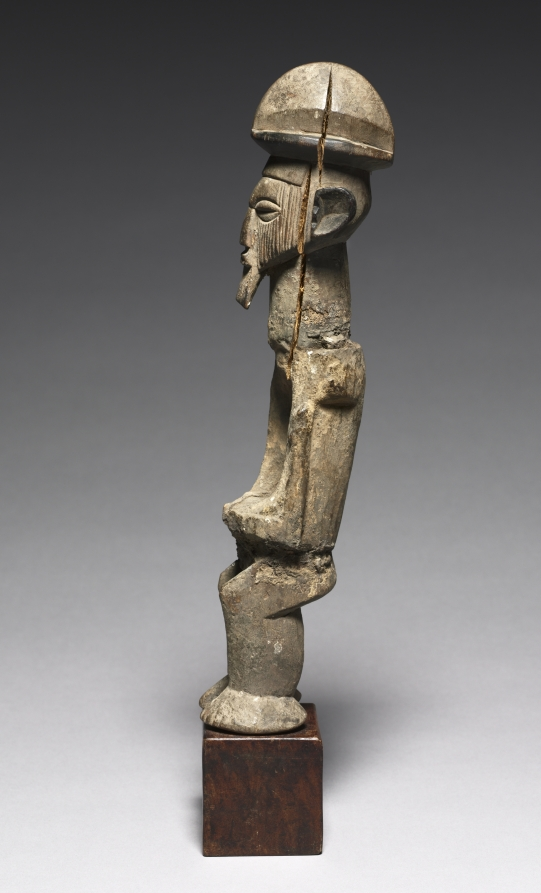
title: Male Figure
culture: Africa, Central Africa, Republic of the Congo or Democratic Republic of the Congo, Teke-style maker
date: early 1800s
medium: Wood and organic materials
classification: Sculpture